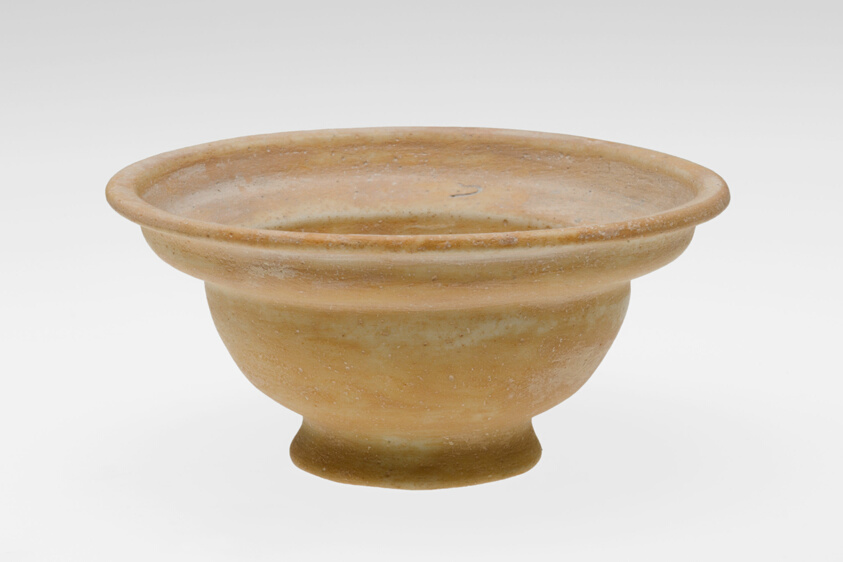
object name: Vessel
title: Bowl or Cup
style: syrian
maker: Roman; probably Italy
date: mid–1st century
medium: Glass, cast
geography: Syria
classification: bowl; glass; vessel; ancient art